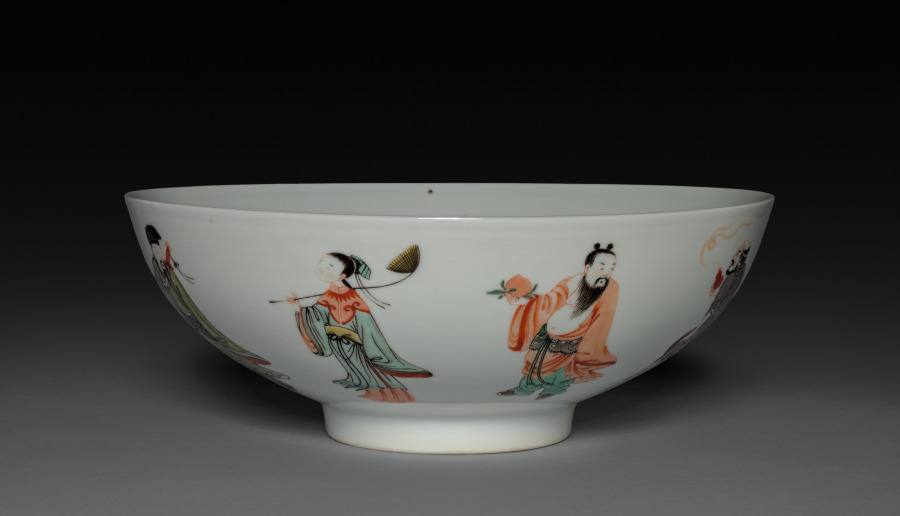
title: Bowl with Eight Immortals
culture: China, Jiangxi province, Jingdezhen kilns, Qing dynasty (1644-1911), Kangxi reign (1662-1722)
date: 1662–1722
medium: porcelain with famille verte overglaze enamel decoration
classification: Ceramic